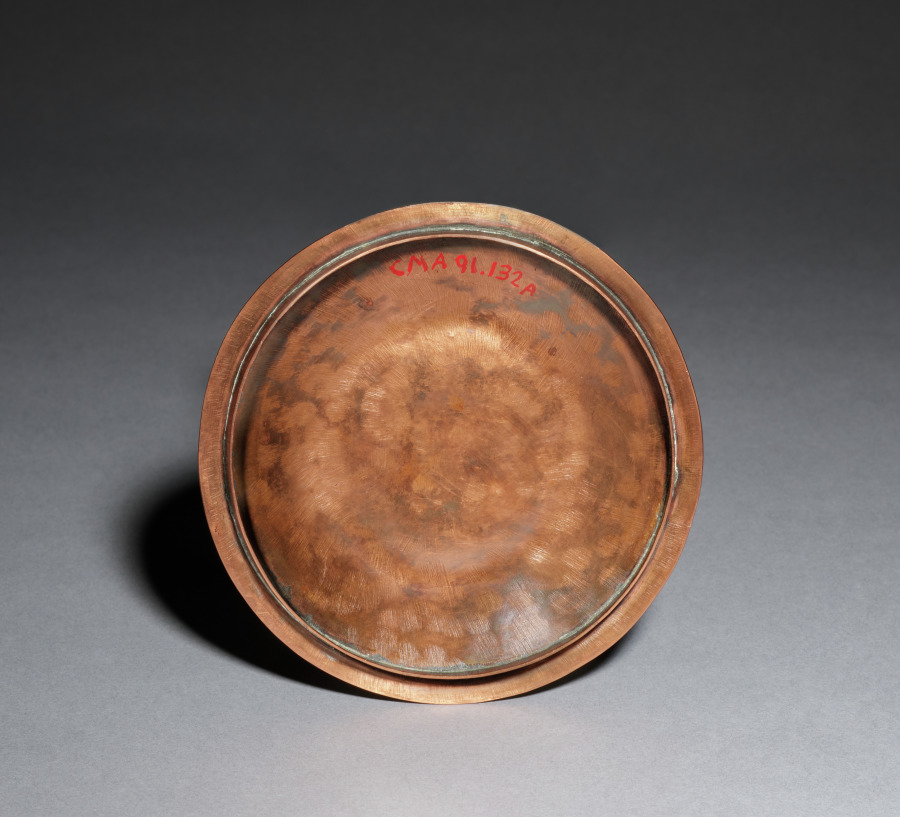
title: Cover for a Bowl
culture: America, Ohio, Cleveland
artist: Kenneth F. Bates (American, Cleveland, 1904–1994)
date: 1927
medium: copper and enamel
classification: Enamel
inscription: incised on bottom: "Kenneth F. Bates 1927."